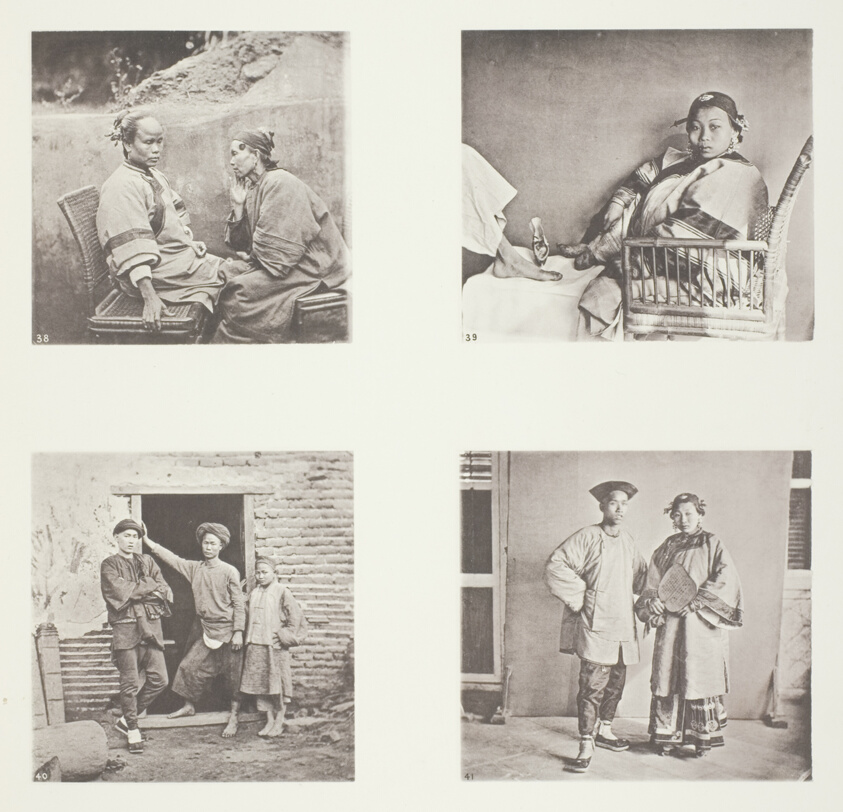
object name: Photograph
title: Amoy Women; The Small Foot of a Chinese Lady; Amoy Men; Male and Female Costume, Amoy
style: 19th century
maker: John Thomson (Scottish, 1837–1921)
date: c. 1868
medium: Collotype, pl. XIV from the album "Illustrations of China and its People, Volume II" (1873)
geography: Scotland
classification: photography; photograph